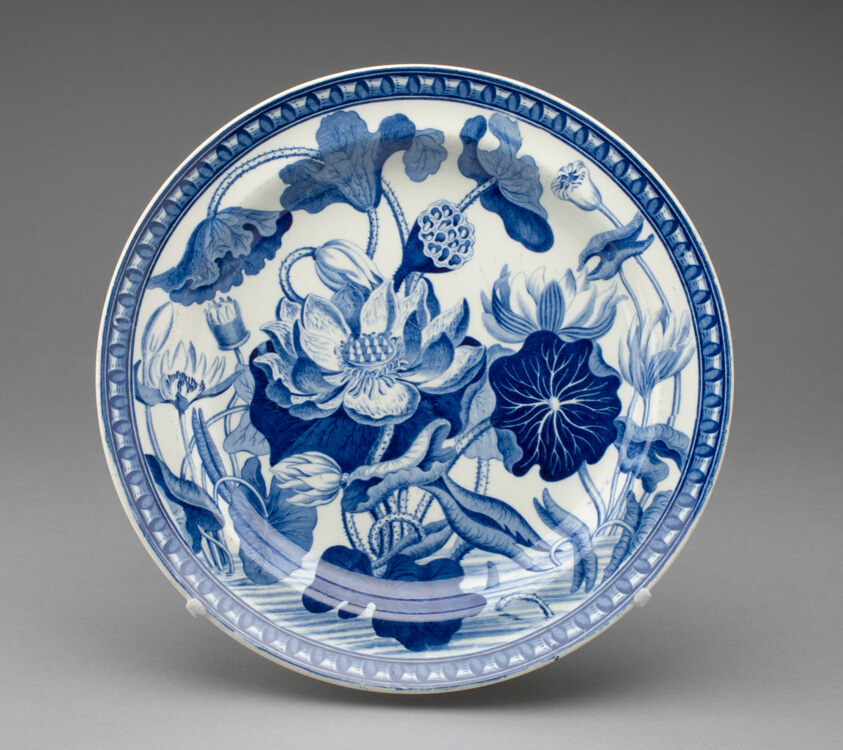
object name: Ceramics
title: Plate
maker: Wedgwood Manufactory (England, founded 1759)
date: c. 1810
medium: Earthenware (pearlware) with underglaze blue decoration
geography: Burslem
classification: plate (general, dish); dish (vessel); pearlware; earthenware; european decorative arts; ceramics